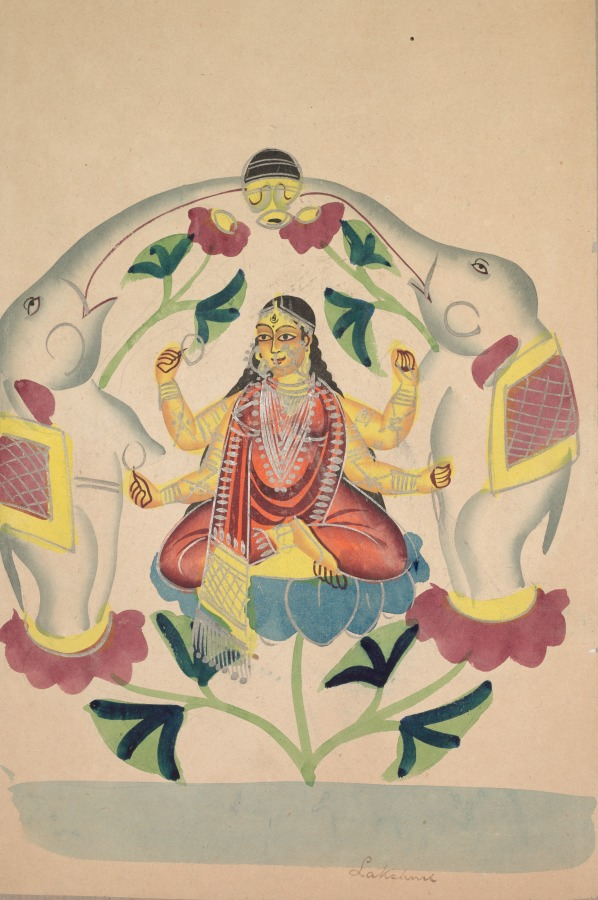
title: Gajalakshmi: Lakshmi with Elephants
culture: Eastern India, Bengal, Kolkata, Kalighat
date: c. 1890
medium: Gum tempera, graphite, ink, and tin on paper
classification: Painting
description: Seated on a lotus in the yoga lotus position (padmasana), Lakshmi (wife of Vishnu and goddess of fortune, prosperity, and beauty) is flanked by elephants that anoint her and express their devotion by bathing her with water from the pot held aloft with their trunks. The lotus seat serves as a throne while the elephants’ trunks form an arch within which she is enshrined.